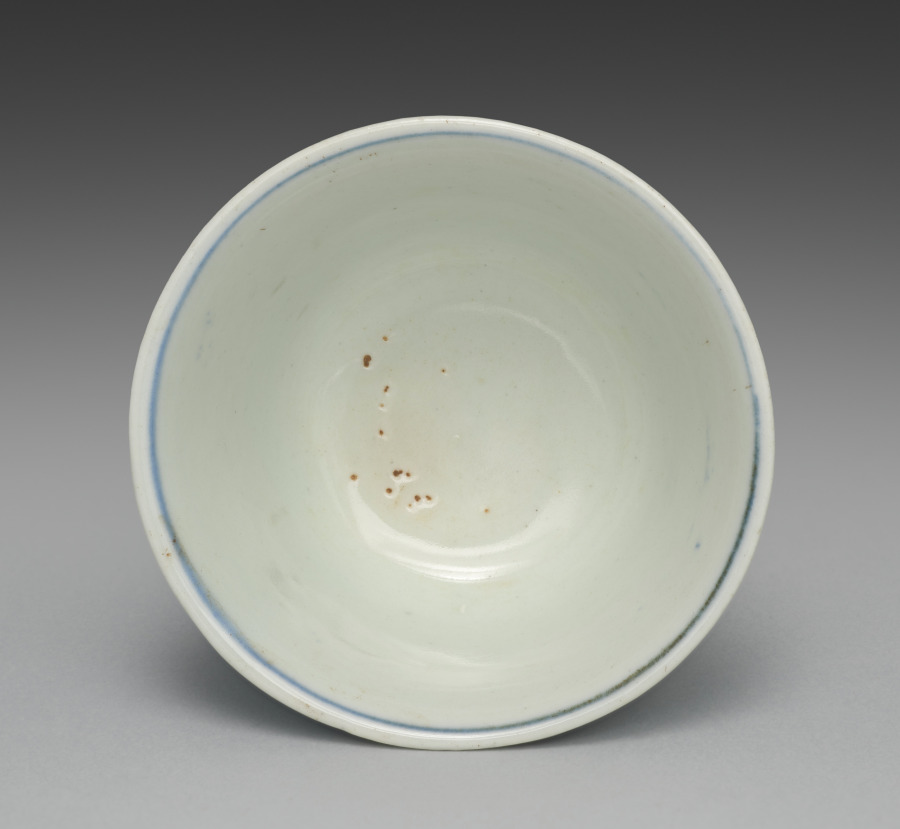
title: Cup from Tea Cups with Dragons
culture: Japan, Edo period (1615–1868)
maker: Seifū Yohei I (Japanese, 1801–1861)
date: 1840s–57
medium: One from a set of five tea cups; porcelain with underglaze blue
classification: Ceramic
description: Seifū Yohei I made both blue and white porcelains after Ming dynasty (1368–1644) Chinese wares fired in the kilns at Jingdezhen for export. He also made colorful stoneware in the style of his teacher, Nin’ami Dōhachi (Takahashi Dōhachi II) (1783–1855).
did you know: A small figure of an elephant serves as the handle for the lid.